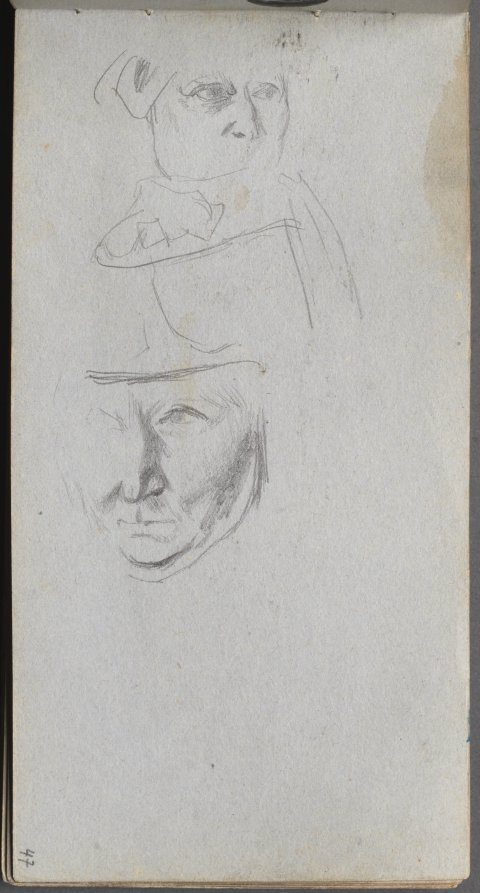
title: Sketchbook, page 47: Studies of Three Faces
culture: France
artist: Ernest Meissonier (French, 1815–1891)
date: c. 1860s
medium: graphite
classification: Bound Volume